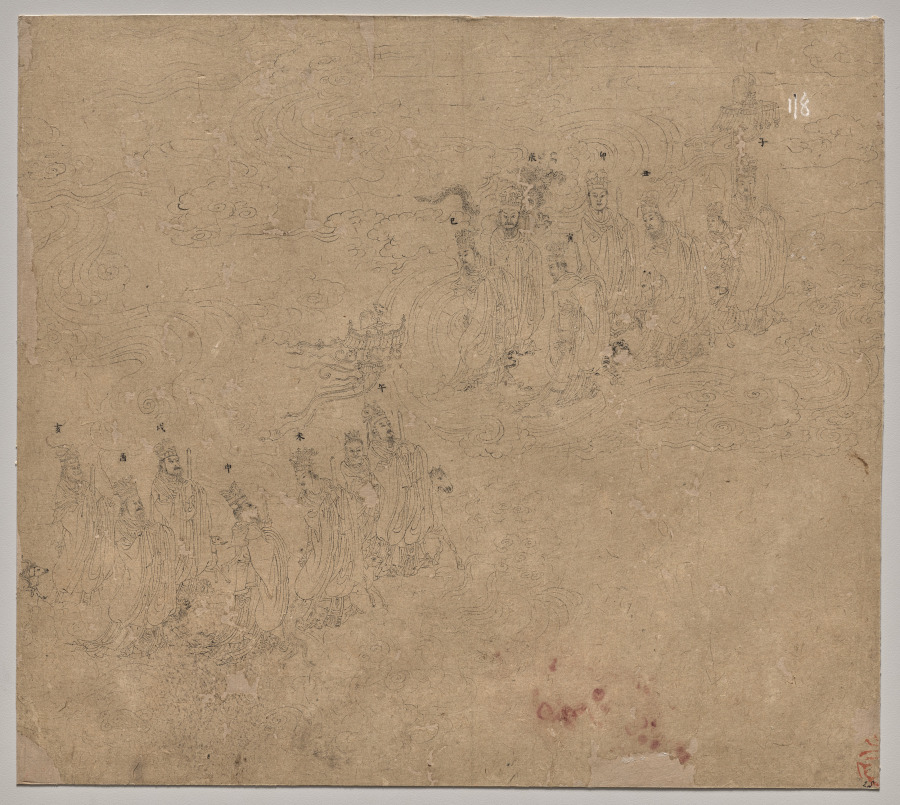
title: Album of Daoist and Buddhist Themes: Procession of Daoist Deities: Leaf 25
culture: China, Southern Song dynasty (1127-1279)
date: 1200s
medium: Album, ink on paper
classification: Painting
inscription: 子; 丑; 卯; 寅; 辰; 巳; 午; 未; 申; 戌; 酉; 亥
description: These twelve figures are personifications of the dizhi 地支, or Earthly Branches. Each is accompanied by its corresponding animal in the Chinese zodiac. The Earthly Branches would normally be accompanied by the ten Heavenly Stems, or tiangan 天干, which suggests a missing leaf.